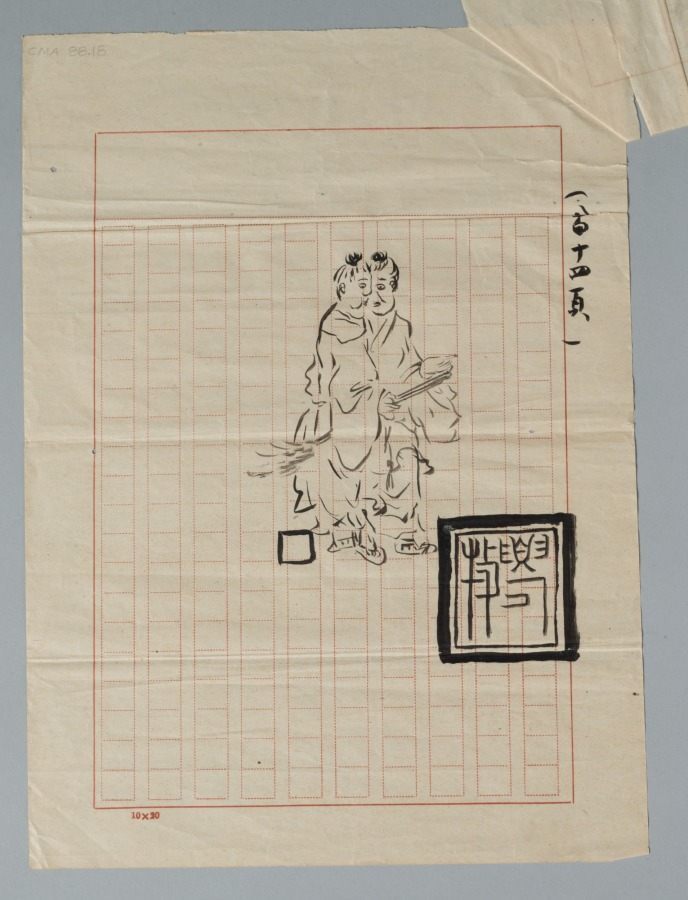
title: Female Daoist Figure in Landscape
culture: Japan, Muromachi period (1392–1573)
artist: Kōboku (Japanese)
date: early 1500s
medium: hanging scroll; ink on paper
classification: Painting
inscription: 「興牧」（朱文方印）